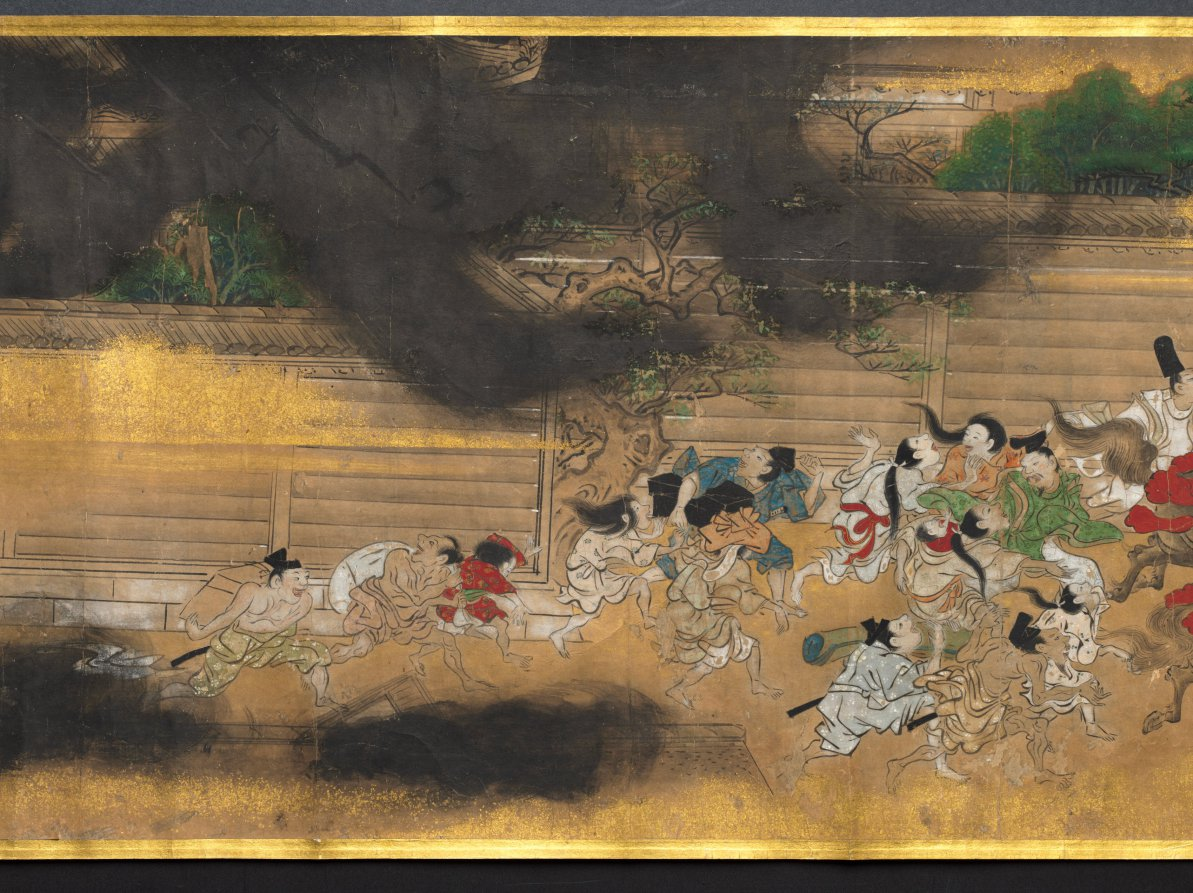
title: People Fleeing from a Fire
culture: Japan, Edo period (1615–1868)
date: 1615–1868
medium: Handscroll; color and gold on paper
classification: Painting